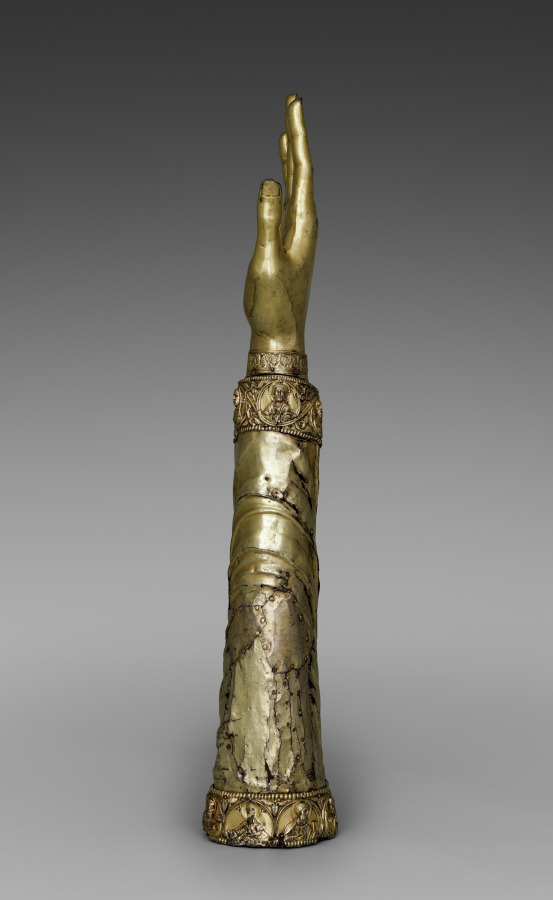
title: Arm Reliquary of the Apostles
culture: Germany, Lower Saxony, Hildesheim, Romanesque period, late 12th century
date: c. 1190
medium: gilt silver, champlevé enamel, oak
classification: Metalwork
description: Taking the form of a clothed lower arm with an outstretched hand, this reliquary from the Guelph Treasure appropriately enshrines a piece of an unidentified saint’s arm bone. Arm reliquaries like this one served as liturgical props; during religious services and processions, the clergy used them to bless and touch the faithful, thus making the presence of the saint more palpable and immediate. The apostle busts that decorate this arm reliquary seem to indicate that the relic it contains is that of an apostle. Duke Henry the Lion, a major patron of the church of Saint Blaise, is known to have received such relics from the Byzantine emperor Manuel I (1143-1180) upon his return from a pilgrimage to Jerusalem.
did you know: Reliquaries were prized not for the opulence that you see, but for the items that they held. They enshrined items associated with saints, like a piece of clothing they wore or a small portion of their remains. In this case, an arm bone is encased within.